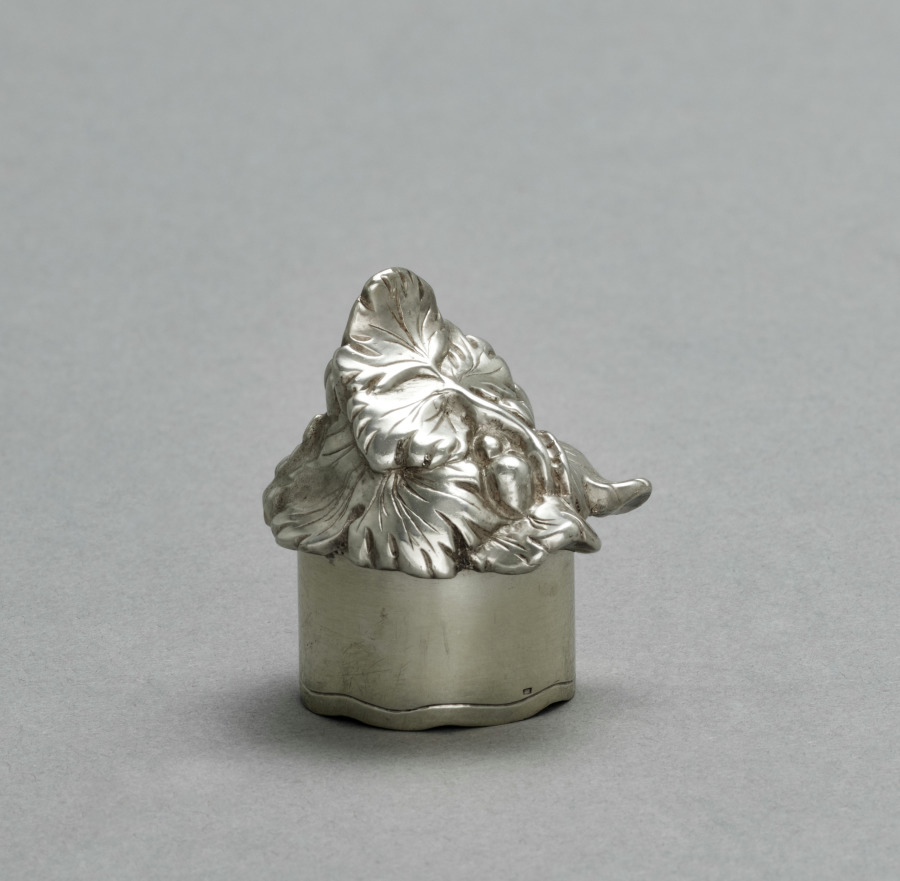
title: Cruet Stand (Bottle Cover)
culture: France, bottle and cover old, but probably not original, 18th Century(?)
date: 1700s(?)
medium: silver and glass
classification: Metalwork